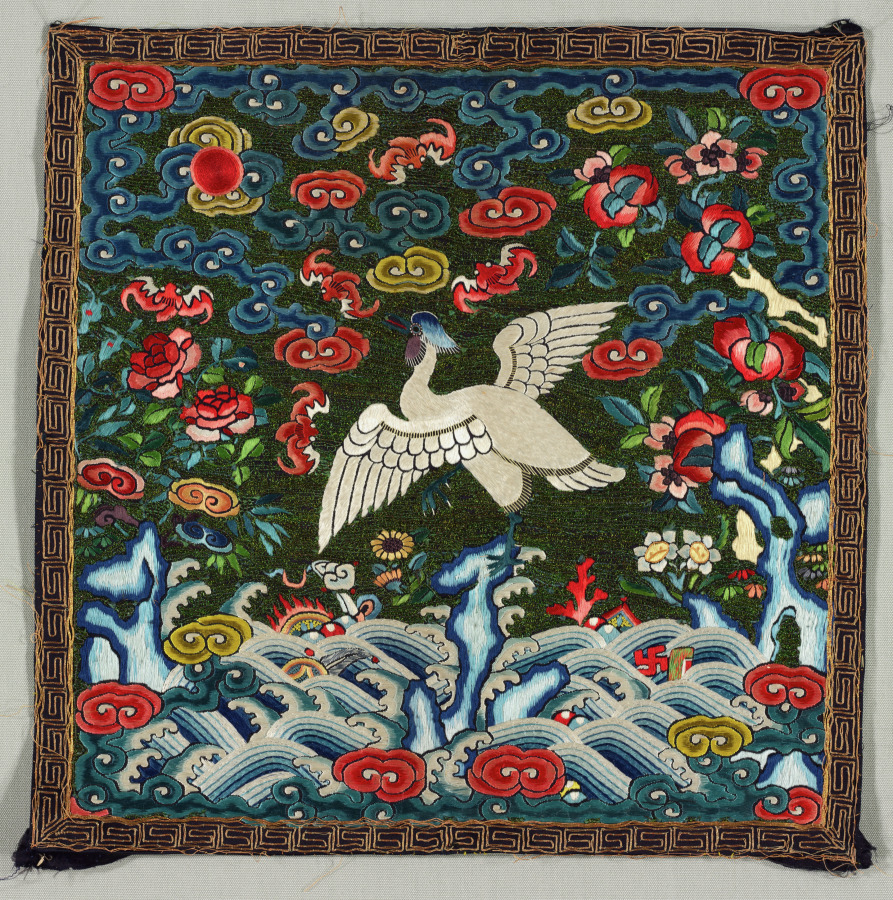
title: Rank Badge (buzi)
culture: China, Qing dynasty (1644–1911), Qianlong reign (1736–95)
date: 1736–95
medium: silk, satin weave; silk, gold metal thread, and peacock feather embroidery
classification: Embroidery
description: Rank badges (also called rank insignia or Mandarin squares) were used in China during the Ming (1368–1644) and Qing (1644–1911) dynasties to demonstrate the wearer’s rank. In 1391 new clothing regulations directed court officials to wear decorative squares indicating their rank—birds for civil officials and animals for military officials. During the Qing dynasty rank badge design was regulated, and certain creatures were associated with specific ranks. Qing badges depict a representation of the universe with a landscape and a central creature, surrounded by clouds and facing the sun. The sun represented the emperor and this composition showed the official’s loyalty to him. An official’s wife wore rank badges that mirrored her husband’s. Most of the examples in CMA’s collection depict creatures facing a sun on the left. Attached to the front and back of a ceremonial robe, rank badges were woven in pairs with identical imagery. One was divided vertically up the center to attach to the front of a robe with a center opening. Rank badges are generally square or rectangular, although round examples exist. They are typically satin weave or slit tapestry weave (kesi) silk. Satin weave badges often have dark backgrounds with silk and/or metal thread embroidery. Some badges incorporate peacock feathers or beads. Late in the Qing dynasty appliqué replaced embroidery to allow for quicker production and a change in rank.